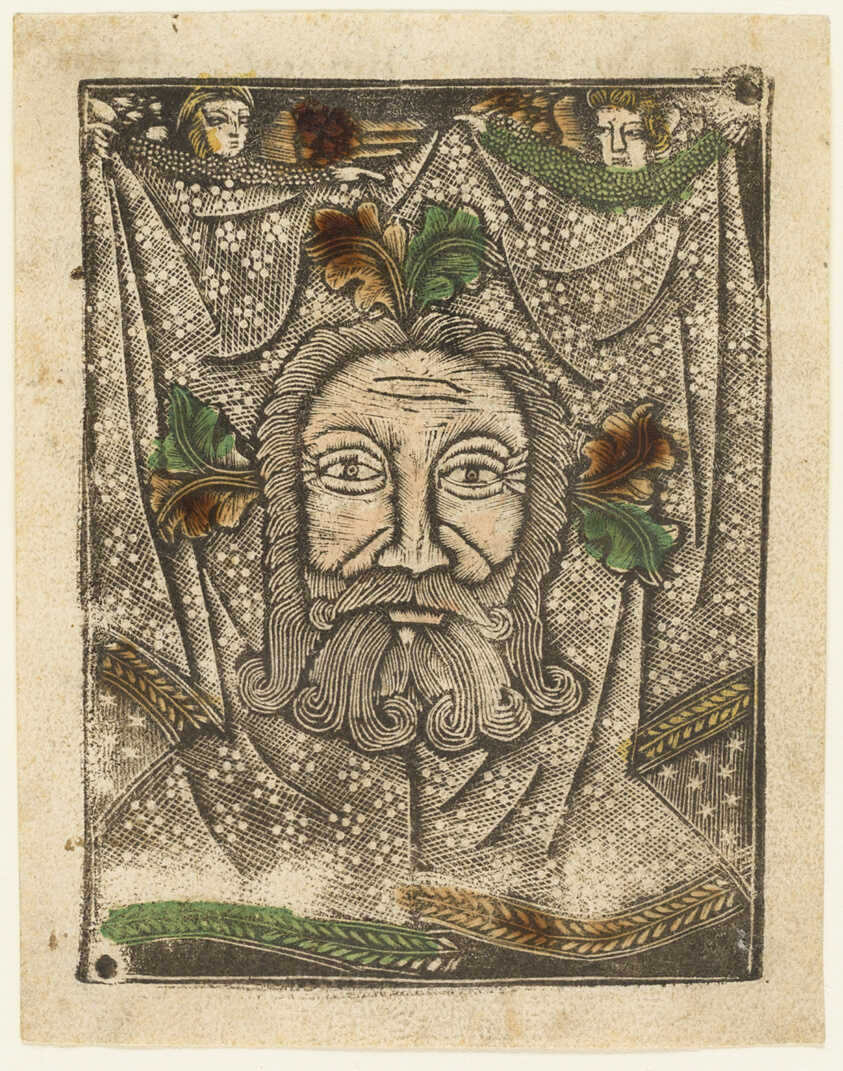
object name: Print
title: The Sudarium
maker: Artist unknown; Bavarian, 15th century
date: 1460–65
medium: Metalcut in black hand colored with brush and watercolor in yellow, red-brown lake, and green, on ivory laid paper, with manuscript text in pen and brown ink on verso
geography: Germany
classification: dotted/metal cut; book; prints and drawing; print